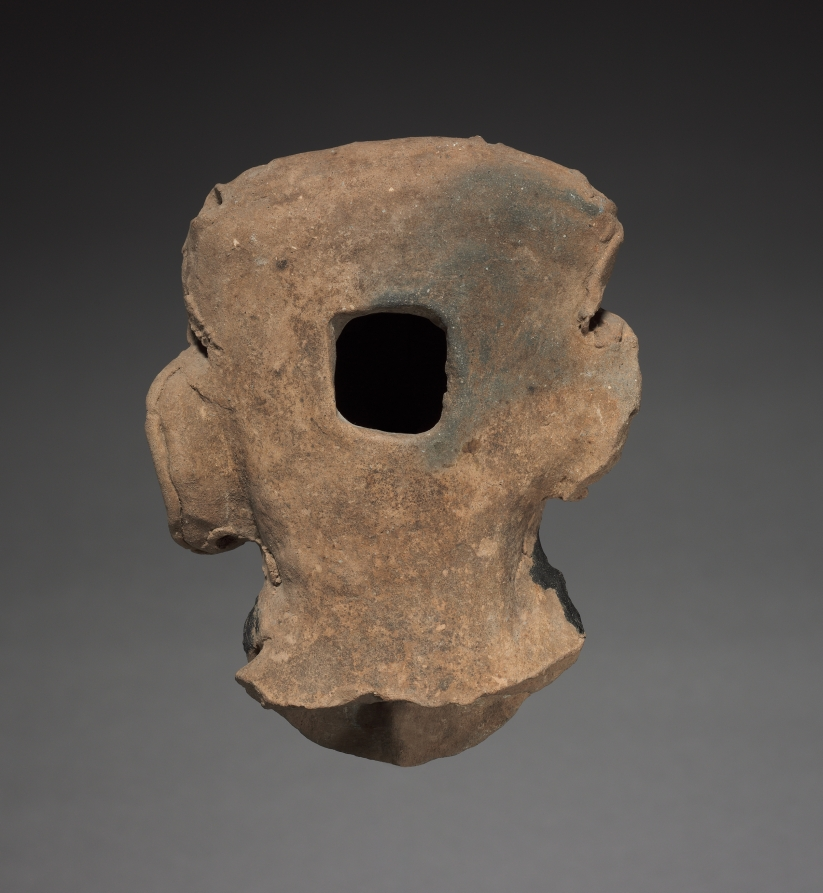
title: Smiling Head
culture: Mexico, Classic Veracruz (Totonac or Tajin)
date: 600–1100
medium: terracotta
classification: Sculpture